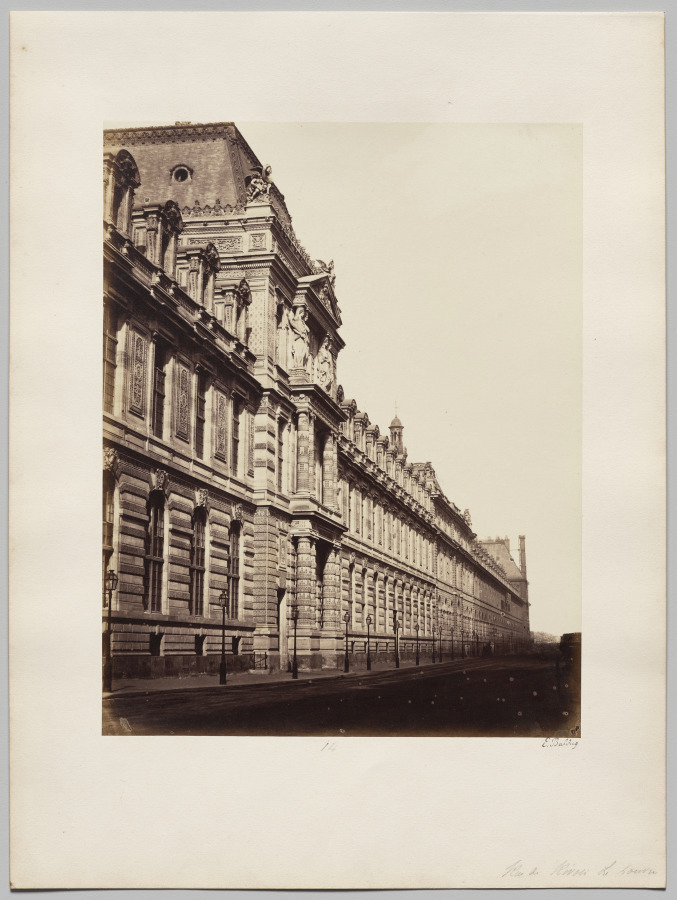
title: Louvre, Façade rue de Rivoli, Paris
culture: France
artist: Édouard Baldus (French, 1813–1889)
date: 1855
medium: albumen print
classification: Photograph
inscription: Written in ink on recto, lower right: "E. Baldus"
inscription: Written in ink on recto: "14"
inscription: Written in pencil on recto: "Rue de Rivoli Le Louvre"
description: Baldus took up photography in the 1840s and became renowned for his architectural views. In 1854, he was commissioned to record construction of the New Louvre, Emperor Napoleon III’s project to build wings that would join the Louvre and Tuileries Palaces and create a vast courtyard. You can enter that courtyard through the arch hidden from view here between the pairs of columns, where you will find the glass pyramid designed by I.M. Pei and completed in 1988.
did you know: Like many early photographers, Edouard Baldus began as a painter.